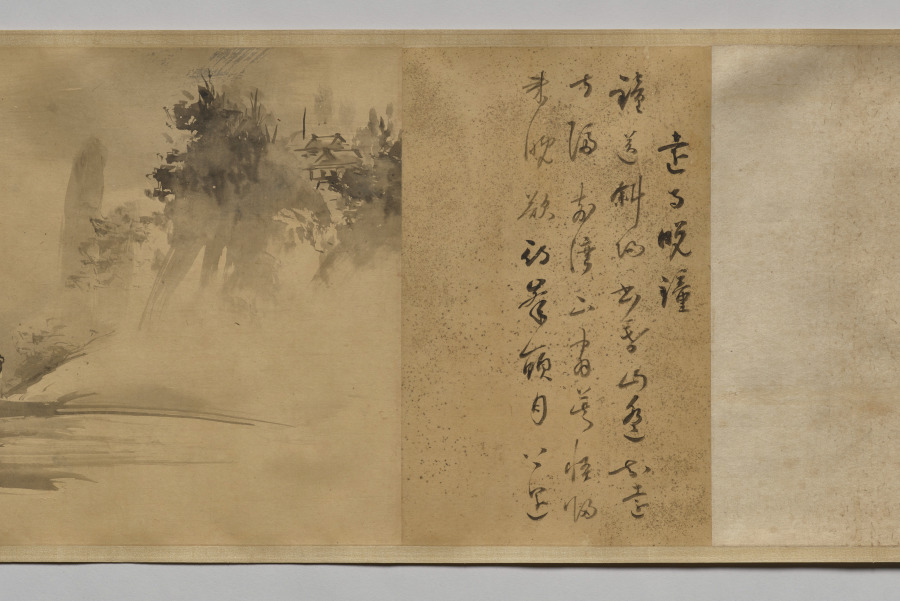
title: Poems and Pictures of the Eight Views of Xiao-Xiang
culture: Japan, Momoyama period (1573–1615)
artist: Unkoku Tōgan (Japanese, 1547–1618)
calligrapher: Inkei Gentetsu (Japanese, 1562–1612)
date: 1605–12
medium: Handscroll; ink on paper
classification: Painting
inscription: Each painting sealed with red gourd-shaped seal reading Unkoku (雲谷) and a square seal reading Tōgan (等顔).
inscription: Each painting prefaced with a titled poem on the Eight Views of Xiao-Xiang by Yujian Ruofen (active late 13th century) inscribed by Japanese Buddhist monk Inkei Gentetsu (1562–1612).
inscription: 右寫玉㵎之筆勢／雪舟末葉等顔筆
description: Unkoku Tōgan brushed these scenes using the splashed-ink technique associated in Japan with the Chinese monk Yujian Ruofen (active late 1200s). Xiao-Xiang refers to the region in present-day Hunan province, where the Xiang River and its tributaries converge. Each of the eight views evokes a time of day or season. The earliest surviving series of Xiao-Xiang paintings is by Wang Hong (active mid-1100s), but textual evidence tells us the theme appears earlier. It was later adopted in Japan and Korea, as seen here. The poems were inscribed by Inkei Gentetsu, the third abbot of the Rinzai Zen temple Tōshunji, Japan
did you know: The “Tō” of Tōgan comes from the name of painter Sesshū Tōyō (1420–1506).